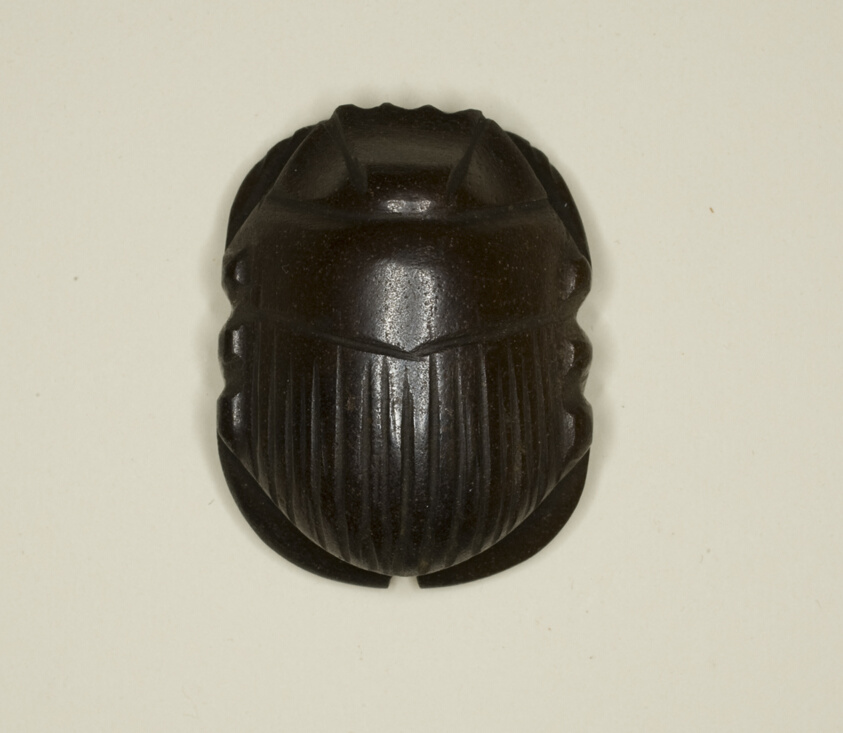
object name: Costume and Accessories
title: Scarab Amulet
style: ptolemaic, greco-roman (egyptian), ancient, egyptian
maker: Egyptian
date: Ptolemaic Period (332–30 BCE)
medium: Hematite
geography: Egypt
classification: scarab; stone; jewelry; amulet; ancient art; costume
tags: scarab beetle, insects